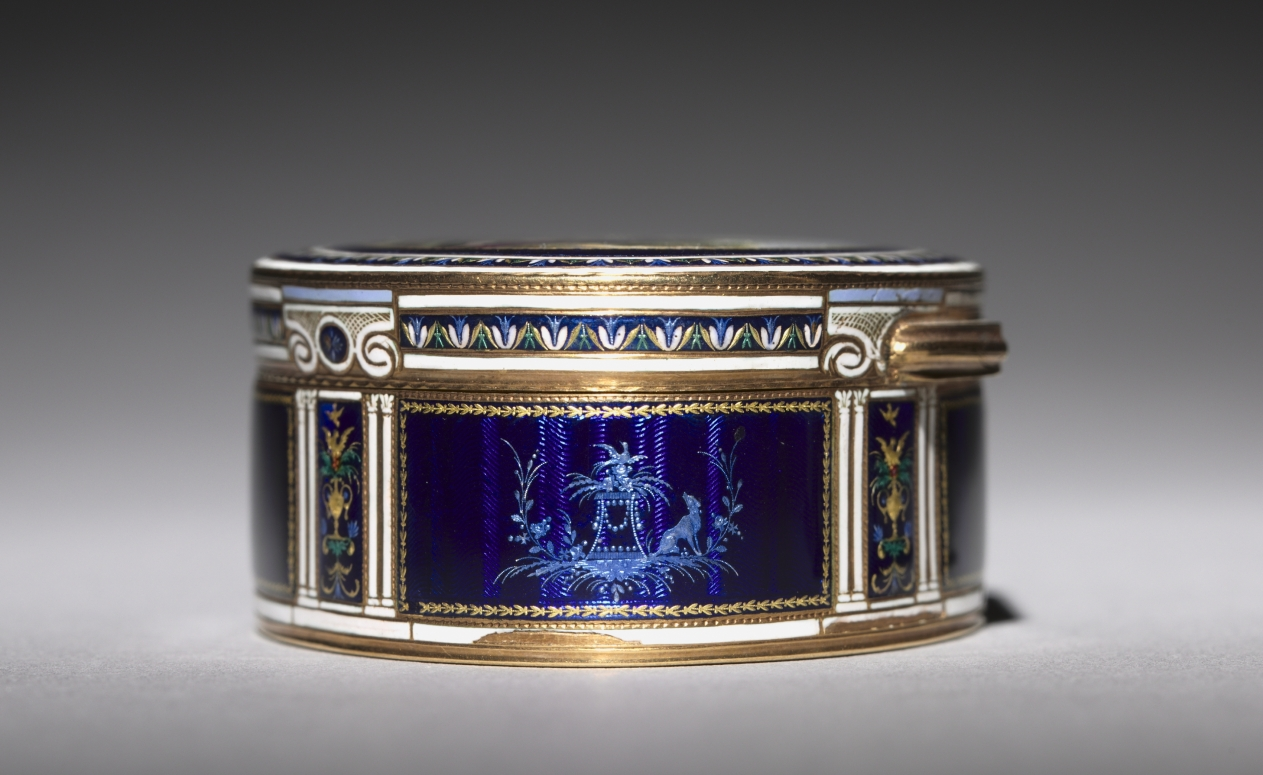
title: Box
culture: Switzerland, Geneva, late 18th Century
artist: Georges Rémond et Cie (Swiss)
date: late 1700s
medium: gold and enamel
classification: Enamel